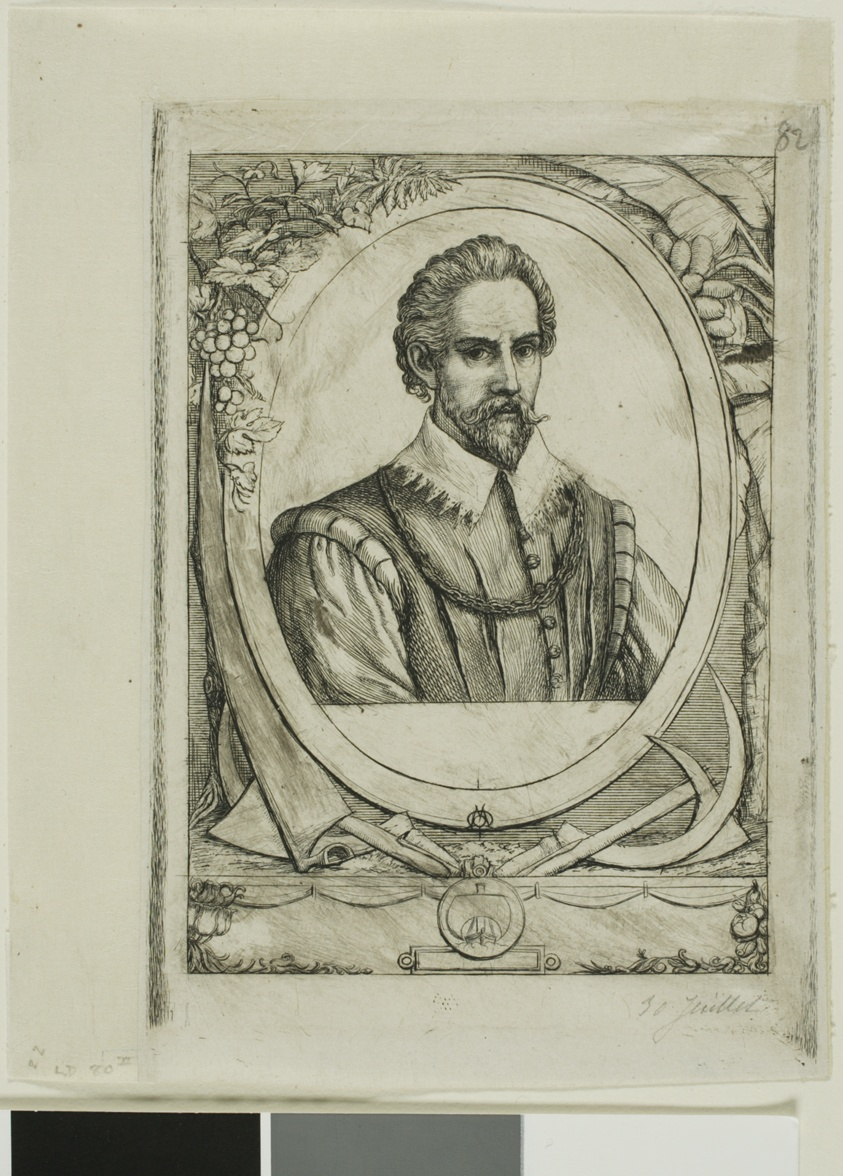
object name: Print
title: Portrait of René de Laudonnière Sablais (de Burdigale)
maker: Charles Meryon (French, 1821-1868); after Crispin van de Passe (Dutch, 1564-1637)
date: 1861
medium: Etching and drypoint with burnishing on grayish ivory laid chine, tipped onto ivory wove Japanese paper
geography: France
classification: etching; print; prints and drawing